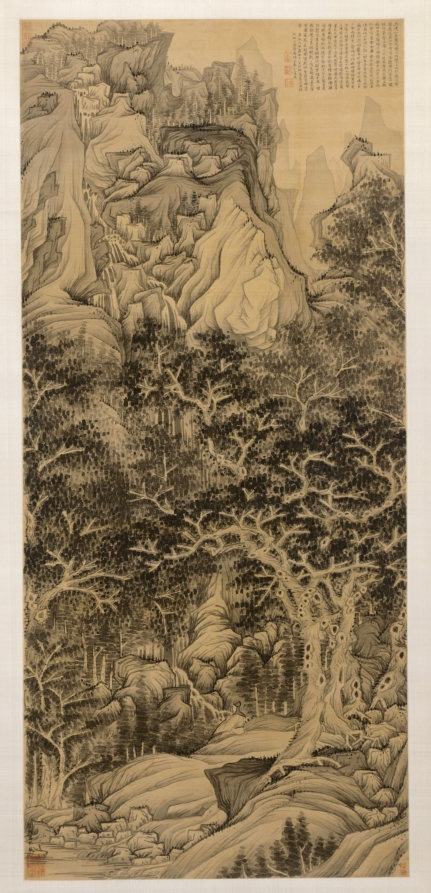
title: The Mountain of Five Cataracts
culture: China, Ming dynasty (1368–1644)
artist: Chen Hongshou (Chinese, 1598/99–1652)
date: c. 1630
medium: hanging scroll; ink on silk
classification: Painting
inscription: Artist's signature and seal at middle right edge: Hongshou [seal] Zhanghou 洪绶 [印]章侯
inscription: Inscription by Gao Shiqi 高士奇 (1645–1704): The Mountain of the Five Cataracts is bordered by three prefectures--Wu [Jinhua], Hang [Hangzhou], and Yue [Shaoxing]--and is quite close to Jiyang [Zhuji] in Yue. The landscape there is extraordinary and precipitous, with ridges and peaks standing in circles. Rocks of strange shapes gaze down everywhere, while maple and bamboo provide shade. The water from five pools overflows and is suspended in five steps--that is why it is called "Five Cataracts." Xie Yuanqing [Xie Tiao 謝朓, c. 464–499] of the Qi Dynasty gathered medicinal herbs here; Diao Jingchun [Diao yue 刁約, 11th century] of the Song Dynasty also visited here; Song Jinhua [Song Lian 宋濂, 1310–1381] and Xu Tianchi [Xu Wei 徐渭, 1521–1593] both wrote travel notes about the place; and Chen Hongshou painted here. His mountains are done in the style of the Six Dynasties masters; the trees are after those of Dong Beiyuan [董源 Dong Yuan, active during the Five Dynasties]--the painting seems to be richly imbued with the primeval spirit. Xu Wei said that the grotto is unique for the shade (yin) and the five cataracts unusual for the sun (yang). There are seventy-two peaks, with a ravine between two cliffs. At times they are bright and at other times, gloomy; sometimes they seem to be open, sometimes closed, yet often border uniquely between shady (yin) and sunny (yang). Zhanghou [Chen Hongshou] really succeeded in capturing that spirit. As a young man indulgently boating through Shanyin [Shaoxing],/ I became familiar with the beauty of the Five Cataracts./ The cold streams, when level, become pools clear as crystal./ Pouring foam mingled with flying waterfall,/ Its shapes constantly changing./ Water would flow downward without a sound,/ Or become raging billows emitting echoes./ Sometimes the wind from the sky would wail,/ The green forest during the day would turn dark./ Sometimes it was dangerous and difficult to ascend,/ For the moss was slippery on the stone steps in those precipitous cliffs./ After reading the travel notes of Sung [Lian] and Xu [Wei],/ I'm afraid their descriptions are incomplete. / Yet when Laolian [Chen Hongshou] was seized with the inspiration to paint,/ His brush and ink moved with exhilaration./ It is as if mists have risen/ From a hot cooking pot, gradually opened./ By hanging this on a plain wall,/ One can clearly listen to the quiet night./ At the end of the year, ice and snow are deep;/ The cold air in the quiet studio is frozen./ Near the fireplace, I make with it a silent, spiritual acquaintance/ Burning incense and striking a lucid qing [stone chime]. On the eighteenth day of the twelfth month in the jimao year of the Kangxi era [1699]. Jiangcun, Gao Shiqi. Zhuchuang inscribed this at Zhe in the Lan Jing studio. It was the third day after the beginning of spring. trans. LYSL/HK/WKH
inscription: Collector's inscription by Gao Shiqi 高士奇 (1645–1704), one column in standard script at the lower left corner: 信天巢秘藏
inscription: 5 seals of Gao Shiqi 高士奇 (1645–1704): 竹窗 Zhu Chuang; 高士奇 Gao Shiqi; 澹人 Danren; 簡靜齋 Jian Jing Zhai (Gao Shiqi's studio; at the upper left corner); 高氏江村草堂珍藏書畫之印 Gaoshi Jiangcun Caotang Zhencang shuhua zhi yin (at the lower left corner).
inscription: Two additional seals at the lower left and right corners are undecipherable.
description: A unique landscape painting in the existing body of Chen Hongshou’s art, this painting reveals his involvement with the practice of fang (imitation) to achieve creative transformation. Chen acquired the tradition stemming from Dong Yuan of the Five Dynasties, with which he sought an artistic individuality that lends his work an idiosyncratic vision and extraordinary power.